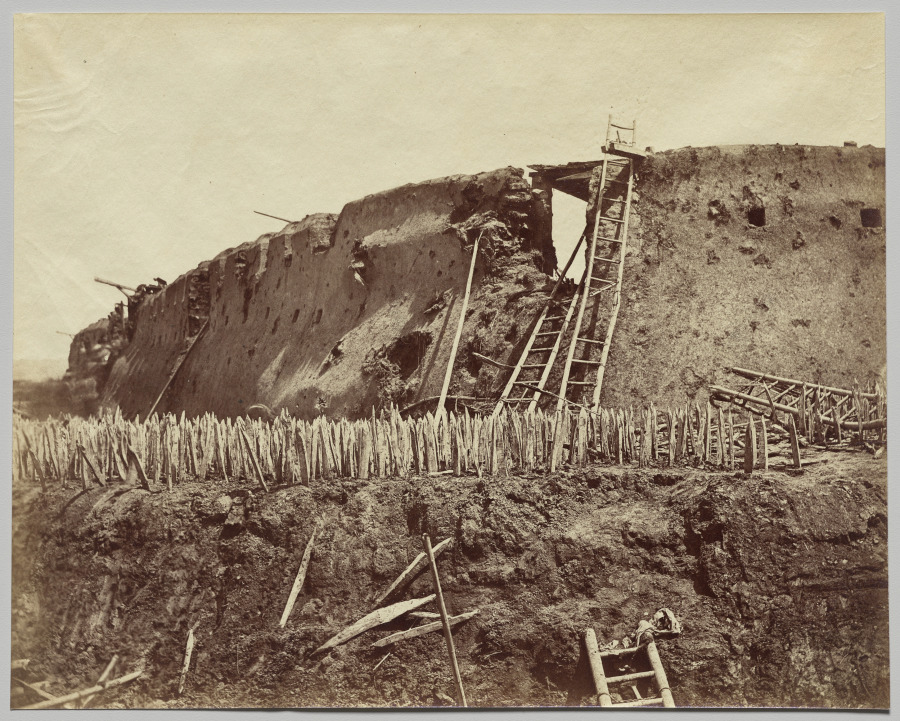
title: Angle of Taku Fort at which the French entered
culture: England, 19th century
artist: Felice A. Beato (British, 1832–1909)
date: 1860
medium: albumen print from collodion negative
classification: Photograph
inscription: Pencil impression on verso: “[illegible under regular lighting]/21st August 1860”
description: Beato’s photographs of the Second Opium War are believed to be the first that captured a military campaign in progress. Within that project, an extended sequence of photographs of the Taku Forts—to which this image belongs—exemplify the idea of creating a narrative recreation of the battle, a process that would later be followed by American photographers documenting the Civil War.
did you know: Felice Beato was one of the pioneers of war photography.